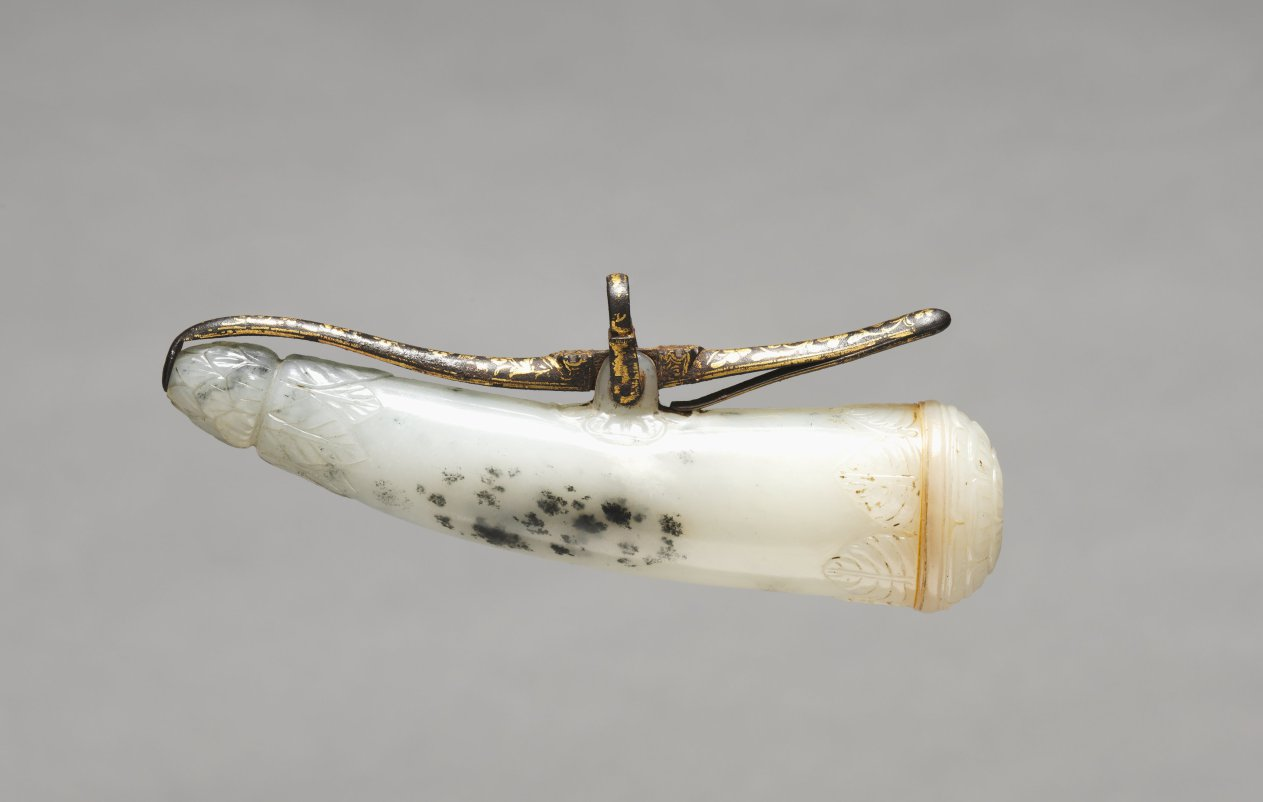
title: Powder horn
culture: India, Mughal, 17th-18th century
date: 1600s-1700s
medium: Jadeite, iron inlaid with brass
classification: Jade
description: Like the firearms themselves, powder horns were made as courtly accessories to be worn as objects of beauty. Most Mughal nobles also served as military commanders, and accouterments of war would be worn as part of their formal attire. For this reason, artisans used precious materials such as white jade, which in this example has been carved with leaf and petal patterns, its natural black inclusions treated as ornament. Pressing down on the simple mechanism opens the hollow inner chamber from which small amounts of gunpowder were administered into the pan of a matchlock musket.